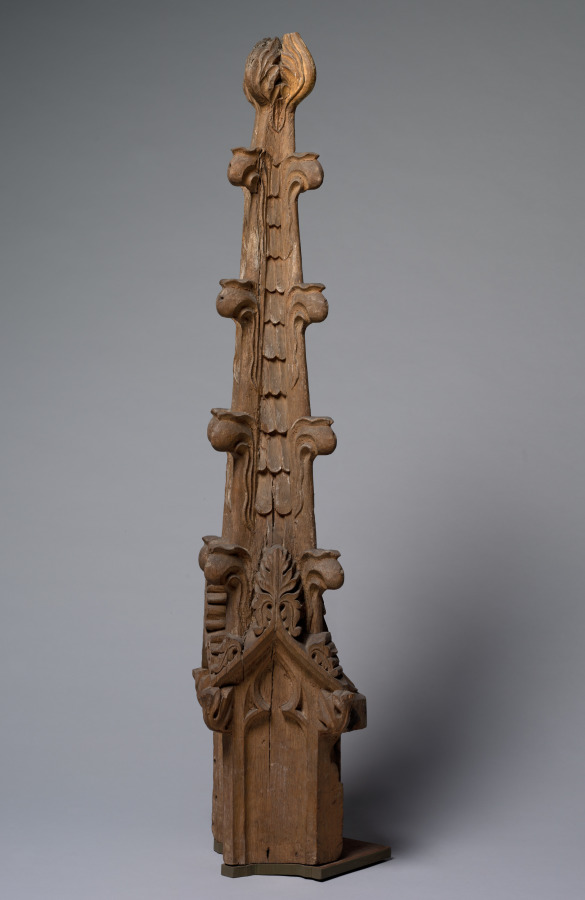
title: Pinnacle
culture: France, 15th century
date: 1400s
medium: oak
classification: Furniture and woodwork